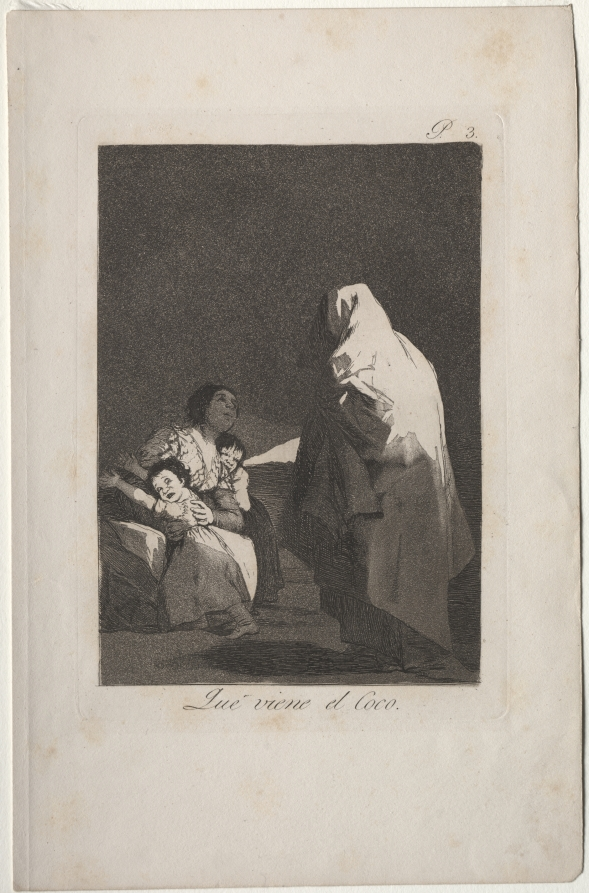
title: Here Comes the Bogeyman, Plate 3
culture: Spain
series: Los Caprichos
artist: Francisco de Goya (Spanish, 1746–1828)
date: 1799 (printed c. 1855)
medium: etching and aquatint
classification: Print